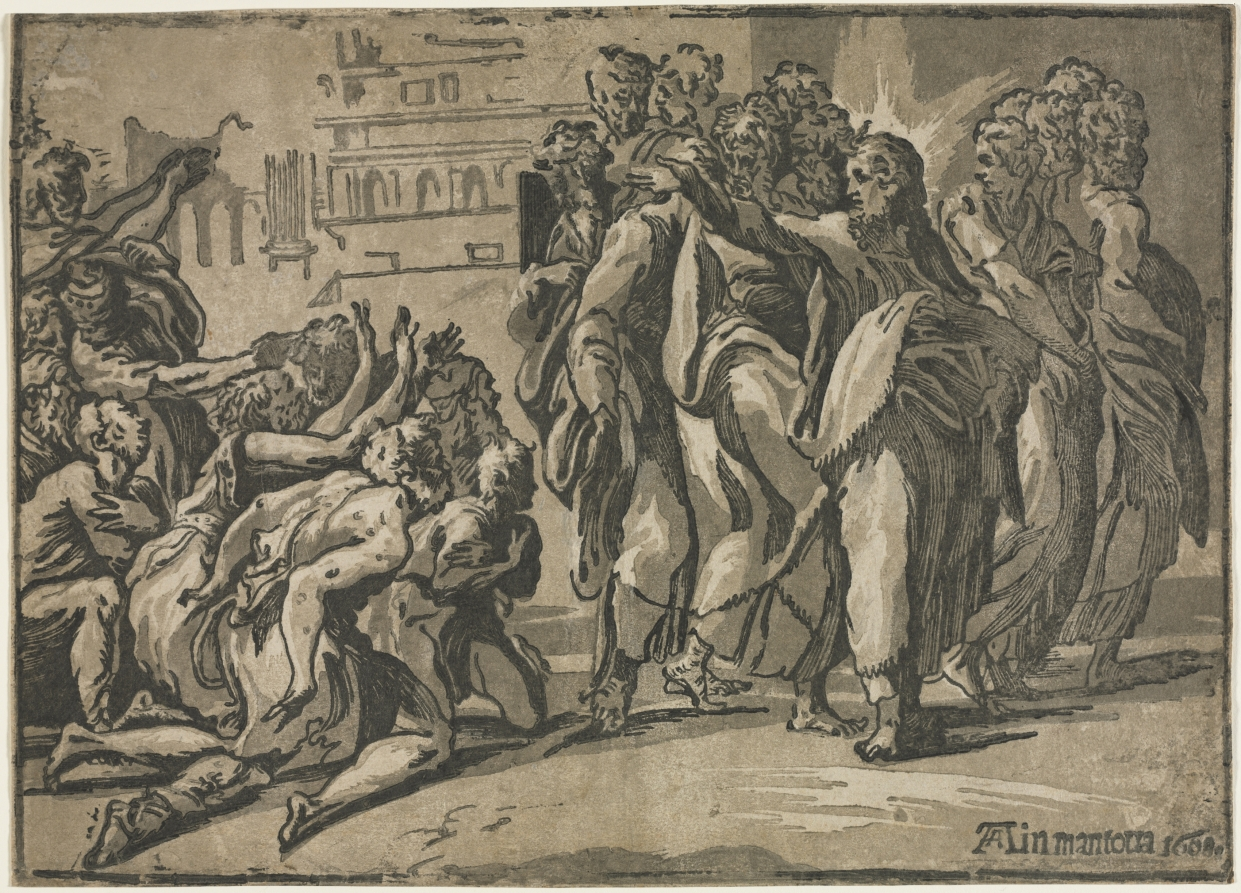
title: Christ Healing the Lepers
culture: Italy, 16th century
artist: Andrea Andreani (Italian, about 1558–1610)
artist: Guiseppe Rossigliani (Italian, c. 1510-)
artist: after Parmigianino (Italian, 1503–1540)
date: 1608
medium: chiaroscuro woodcut (in two shades of gray and black)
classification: Print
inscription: lower left, in block (black): AA in mantoua 1608. [AA in monogram] ; lower left, in block (light gray): IOSEPH [. NICOLAUS / VICENTINI] ; VERSO, lower left, in pen and brown ink: Andrean[ia?] Andrean[onr?] Andrean[eus?] ; across bottom, in graphite: Andrea Andreani (wood cut- in chi- scur) / 1560-1623 ; lower right, in graphite: p. 39. n· 15 / 2nd imp n. ; lower right, in graphite: Vincentino ; lower right, in graphite: 181-- 10/ ; lower right, in graphite: A[p?]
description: This print portrays Christ—with the twelve apostles—miraculously healing a group of lepers encountered on his way to Jerusalem. Andrea Andreani who, after 1599, acquired a number of the earlier blocks of artists like Vicentino and Ugo de Carpi. He published these as his own, reworking them in some cases and adding his initials, an in the CMA example.